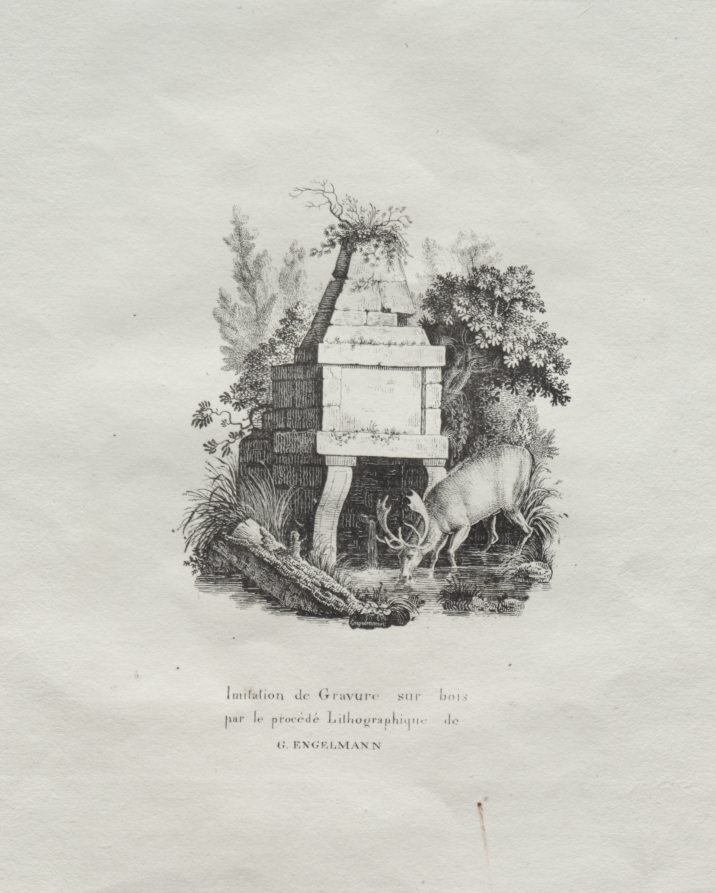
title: Receuil d'essais lithographiques: Une fontaine imitant la gravure sur bois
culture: France, 19th century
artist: Godefroy Engelmann (French, 1788–1839)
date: c. 1816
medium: lithograph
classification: Bound Volume